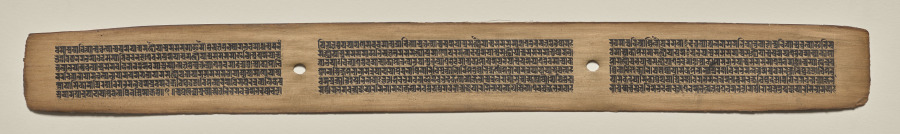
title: Text, Folio 99 (recto), from a Manuscript of the Perfection of Wisdom in Eight Thousand Lines (Ashtasahasrika Prajnaparamita-sutra)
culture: Eastern India, Bihar, Vikramashila Monastery. Painting: Nepal, Kathmandu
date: Sunday, September 14, 1119 (year 239 of the Newar Samvat in the month of Ashvina)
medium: gum tempera and ink on palm leaves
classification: Painting